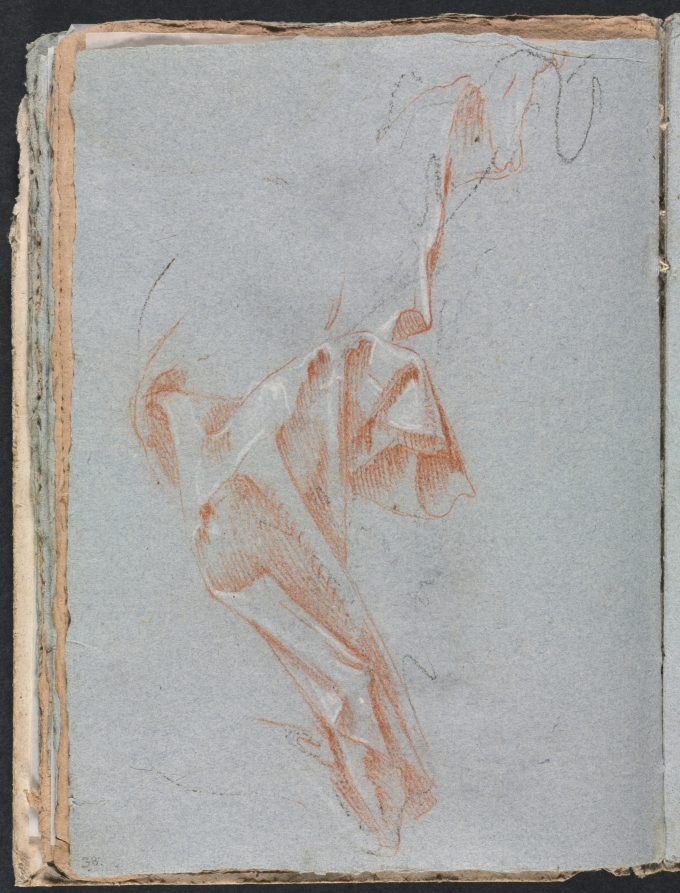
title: Verona Sketchbook: Drapery study (page 38)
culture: Italy, 18th century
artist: Francesco Lorenzi (Italian, 1723–1787)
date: 1760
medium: red chalk with white heightening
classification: Bound Volume